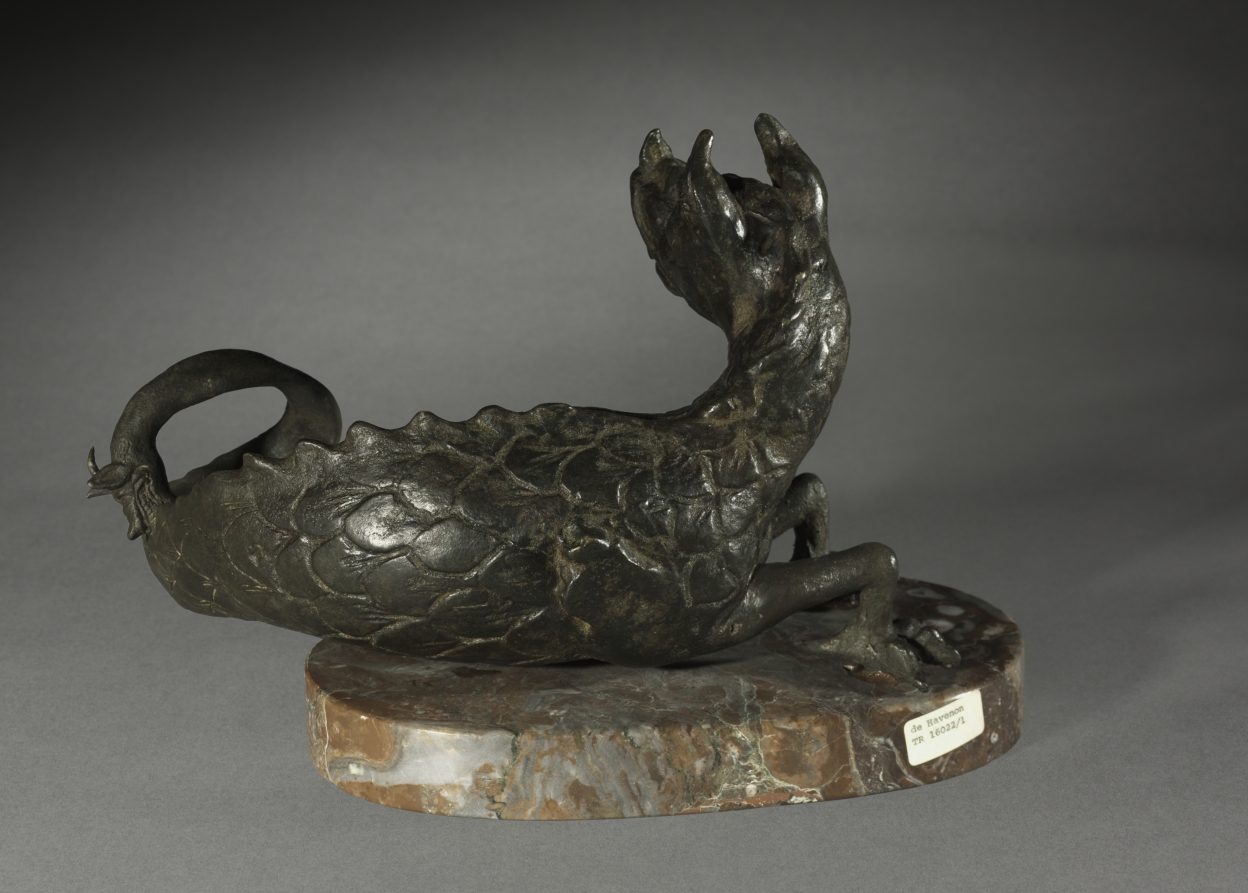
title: Dragon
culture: Italy, 18th century or later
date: 1700s or later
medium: bronze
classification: Sculpture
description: This figure was probably originally meant to serve as the decorative foundation to a larger object such as a casket or urn. In transition from decorative motif to independent work of art, the nether half may have been an addition, evidenced by the seam along its torso.